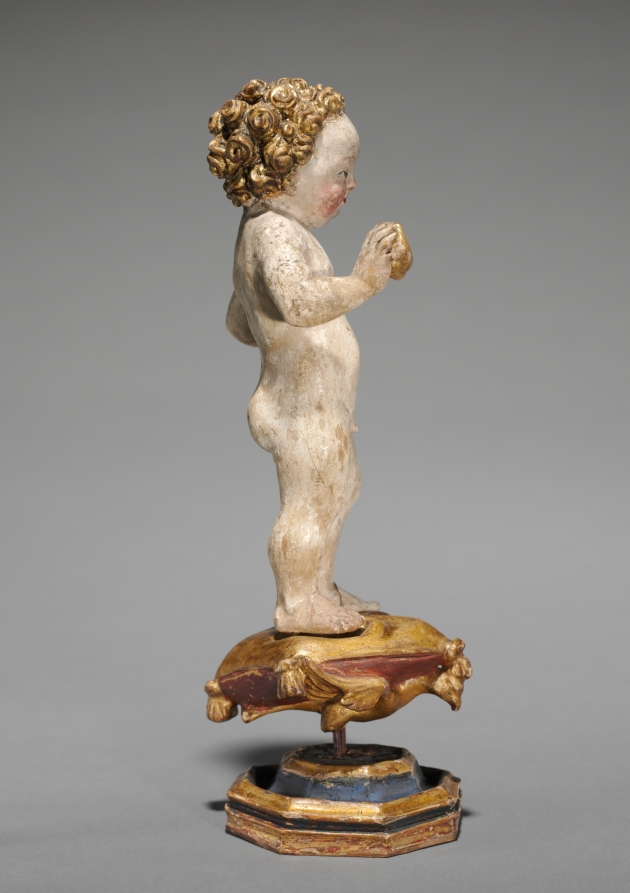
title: The Christ Child Holding a Pomegranate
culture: South Germany, 16th century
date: c. 1510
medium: painted wood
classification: Sculpture